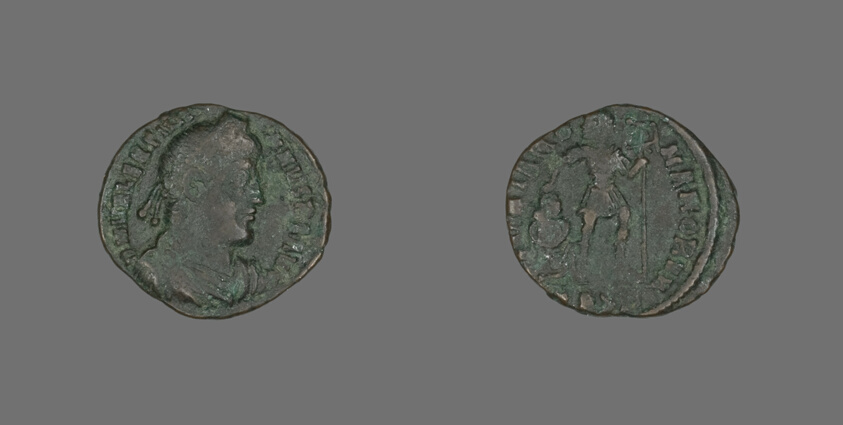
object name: Coin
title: Coin Portraying Emperor Valentinian I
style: roman (ancient, style or period), ancient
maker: Roman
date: 364-375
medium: Bronze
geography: Roman Empire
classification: coin; ancient art